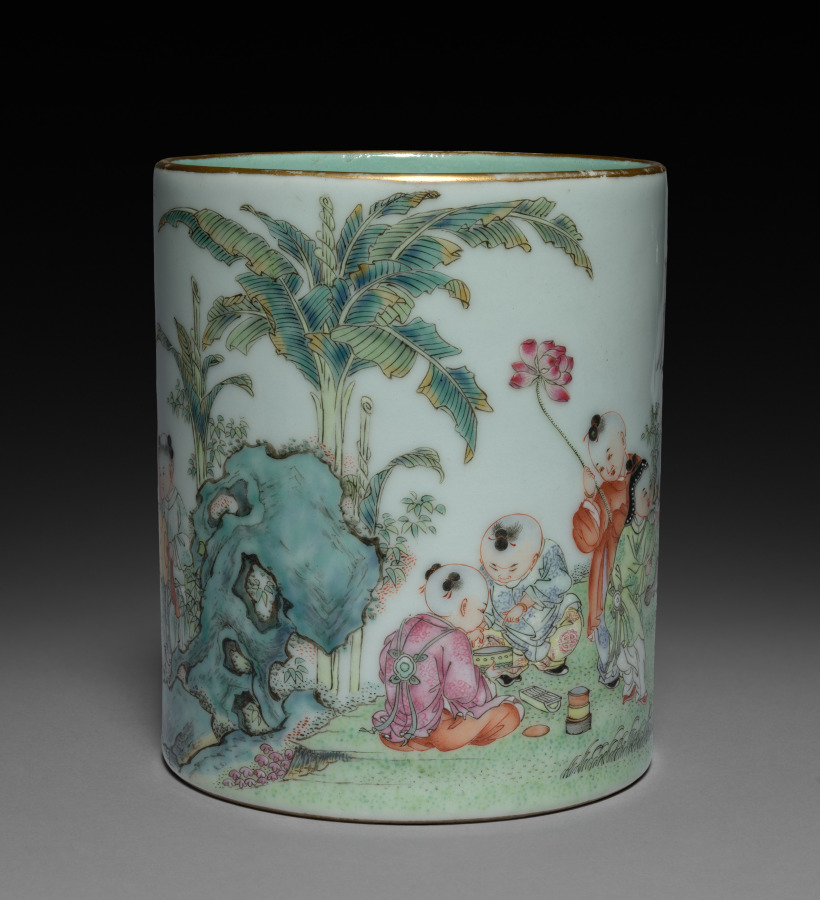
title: Cylindrical Brushholder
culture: China, Qing dynasty (1644–1911), Qianlong reign (1736–95)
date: 1736–95 or later, mid-1800s?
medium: porcelain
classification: Ceramic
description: The brush holder shows children celebrating seasonal festivals, pursuing games, and masquerading as adults with attributes that suggest their future careers in the military or civil service. Three boys play in the shadow of a garden rock with cricket cages; others parade a boy on a goat who wears the headgear of a scholar who passed first in the state examinations. Left to the goat kneels a boy who is about to ignite fire crackers lined up on a stone, a custom to celebrate the New Year. Moreover, the combinations of motifs form puns that express auspicious wishes.